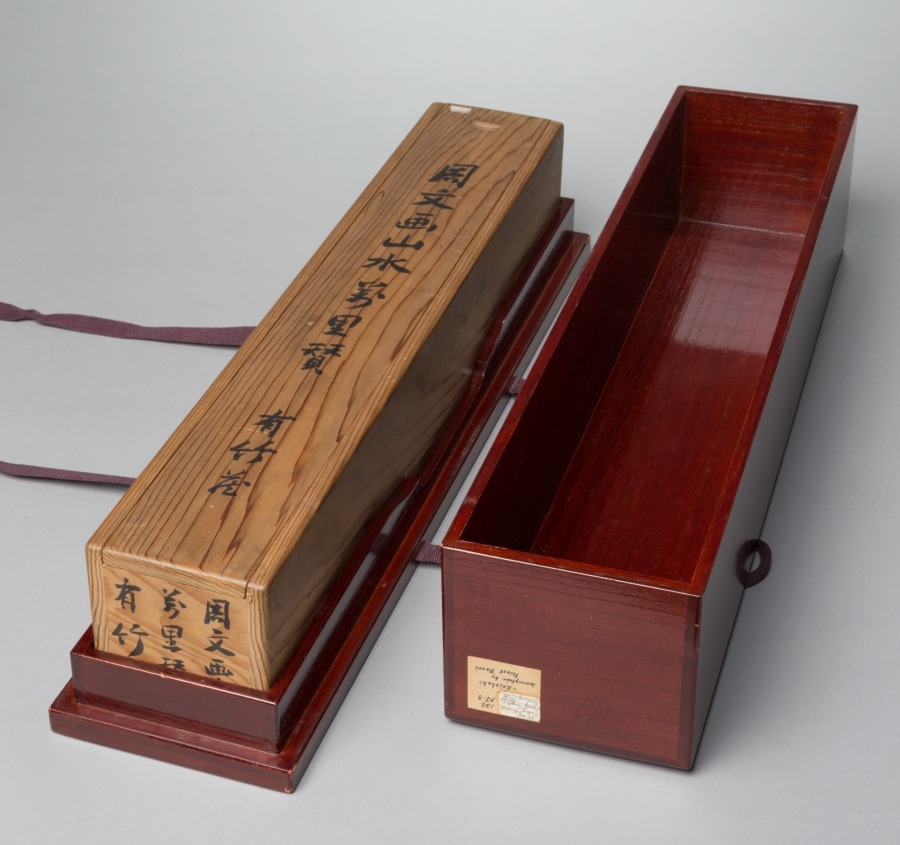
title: Lonely Temple and Towering Cliff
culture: Japan, Muromachi period (1392–1573)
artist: circle of Kenkō Shōkei (Japanese, active 1478–1506)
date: c. 1480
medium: hanging scroll; ink and slight color on paper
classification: Painting